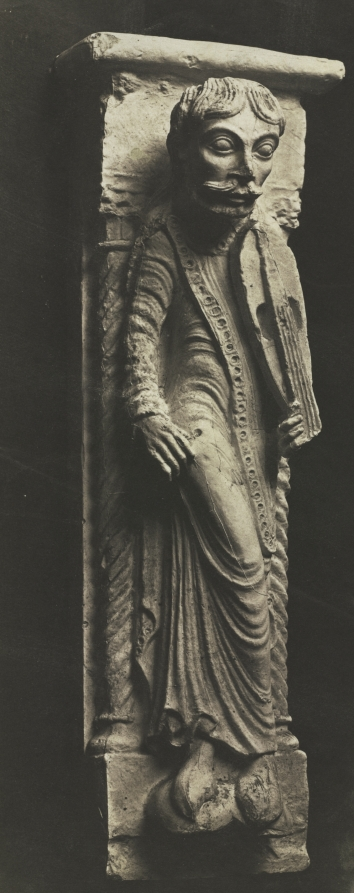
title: Plaster Cast of Sculpture from the Royal Portal of Chartres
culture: France, Dijon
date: c. 1854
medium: salted paper print from wet collodion negative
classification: Photograph